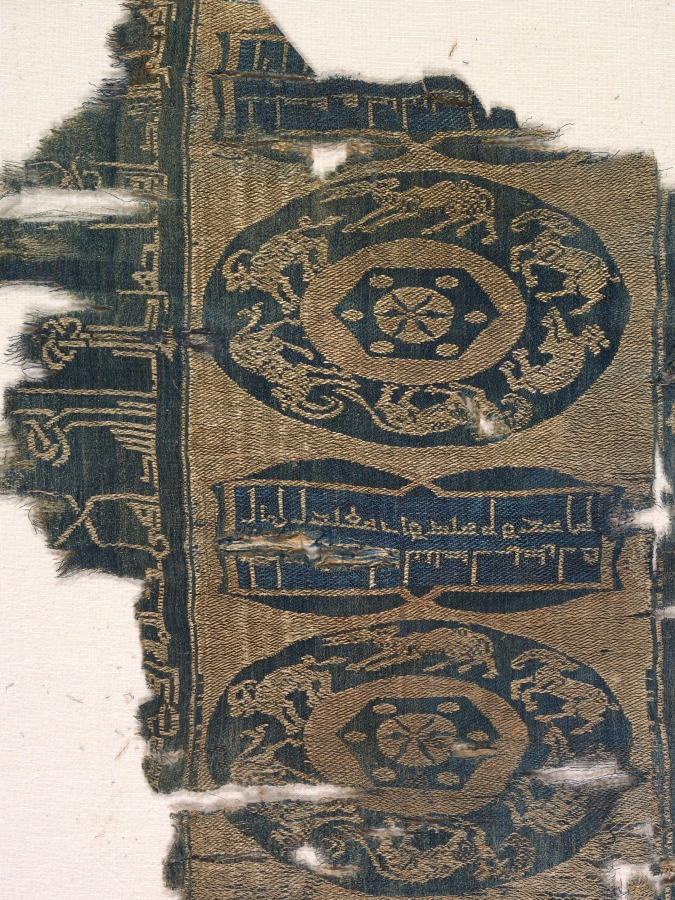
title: Fragment with running animal roundels and kufic inscriptions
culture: Iran, in the style of the Buyid period (945–1055)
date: 1530–1950 (radiocarbon date, 95% probability)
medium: Silk: lampas weave, brocaded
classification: Textile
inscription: [daygha]m wa-kam asadan rawwa'a juhur kilab aya asadan fi jismihi ruh. . .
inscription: . . .aya asadan fi jismihi ruh daygham wa-kam asadan rawwa'a [ju]hur kilab aya asadan fi. . .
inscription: inni i'taqadtu bi-wa'idka wa-'adlika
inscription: wa-arhab ihsanika [wa-fad]lika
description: This fragment preserves a wide central band flanked by narrower inscription bands. The narrower bands contain, on a dark blue background a continuous inscription in elaborate Kufic, the ivory-colored lettering oriented at right angles to the warp. On the wider ivory panel there appear ovals enclosing a frieze of running animals within which are hexagons enclosing stars. The ovals alternate vertically with cartouches containing an inscription in simple Kufic, the design appearing in blue, pink, and ivory.